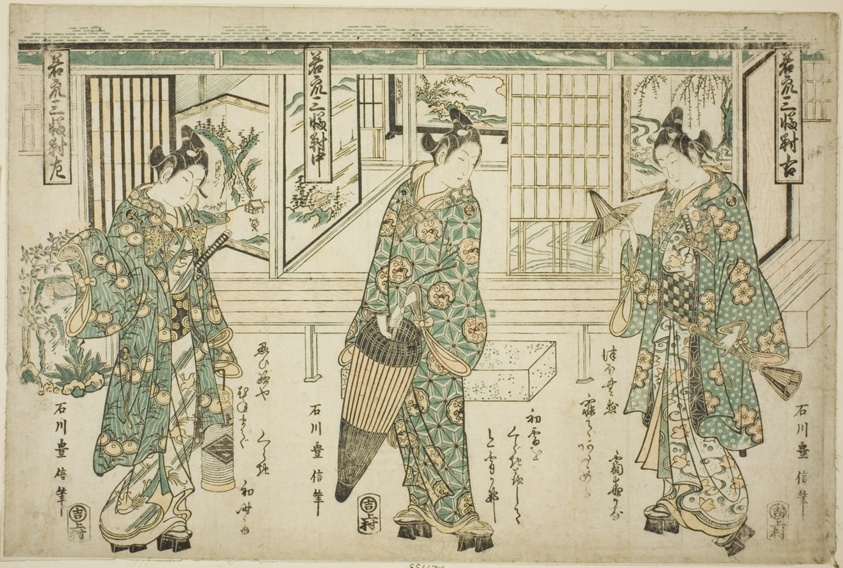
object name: Print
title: Young Men of Fashion - A Set of Three (Wakashu sanpukutsui)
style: Japanese (culture or style)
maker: Ishikawa Toyonobu (Japanese, 1711-1785)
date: early 1750s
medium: Color woodblock print; uncut hosoban triptych, benizuri-e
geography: Japan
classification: woodblock print; print; asian art